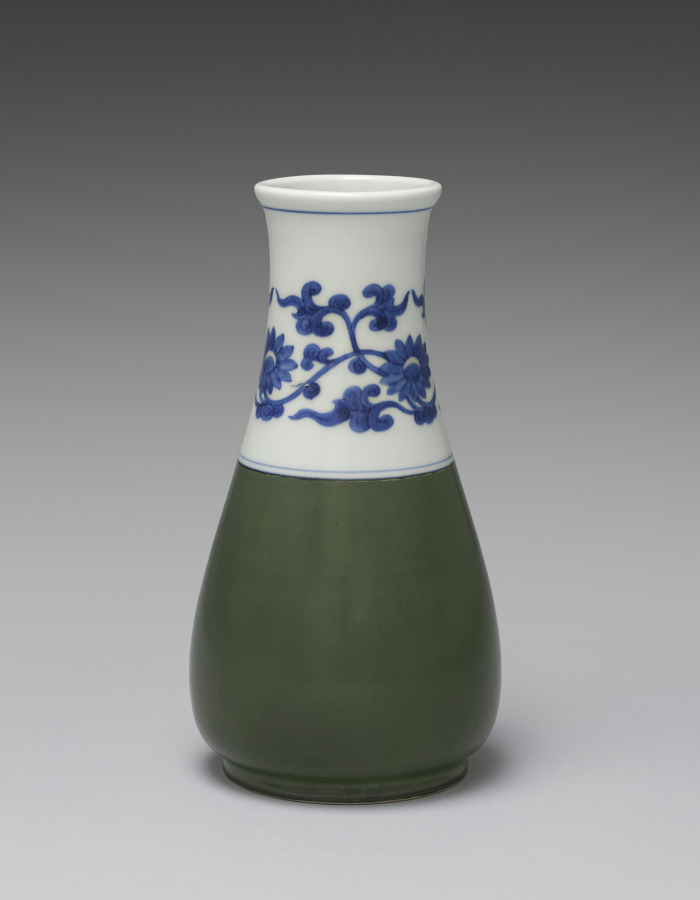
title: Flower Vase with Floral Scroll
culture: Japan, Meiji period (1868–1912)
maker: Seifū Yohei III (Japanese, 1851–1914)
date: 1893–1914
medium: Porcelain with underglaze colors and green glaze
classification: Ceramic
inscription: 清風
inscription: 帝室技芸員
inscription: 金聲玉振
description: The upper part of this vase is painted in underglaze blue with a floral scroll of leaves accentuated with a single chrysanthemum motif on each face and bound at top and bottom with single blue lines. The box lid for the vase is short on detail; the inscription notes only that it is a flower vase with underglaze blue. It is possible that the box is a mismatch because the inscription does not mention the vase’s more distinctive feature: the deep green glaze on its lower half, which is seen much less frequently among Yohei III’s works. This glaze may be an example of a dark green porcelain glaze called rōkanji, which the artist invented in 1892. The name of the glaze comes from Chinese, in which it is pronounced langgan. It may literally mean “tinkling sound of jade” and could refer to malachite, among other proposed identifications.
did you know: The center of each chrysanthemum has a crescent-shaped design at the top filled with a very pale yellow wash under the transparent glaze.